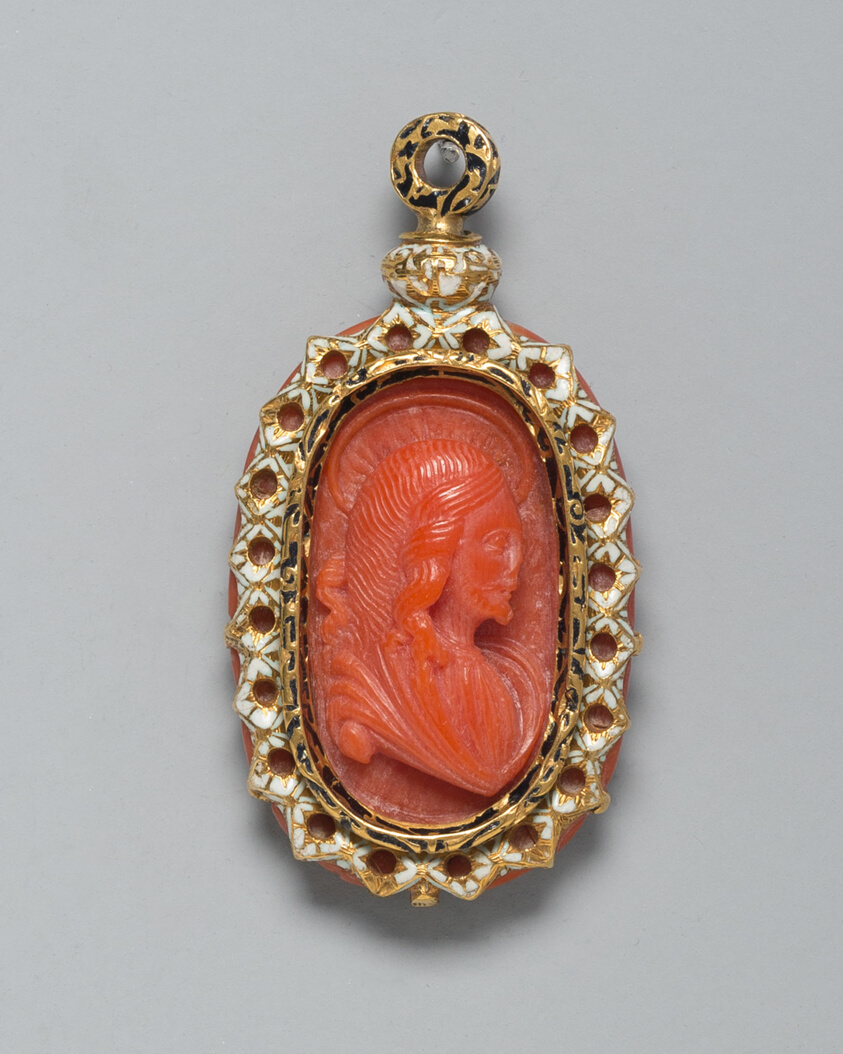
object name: Costume and Accessories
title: Double-Sided Pendant with the Virgin and Christ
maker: Italian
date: 18th century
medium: Gold, enamel, and coral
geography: Italy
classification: pendant (jewelry); jewelry; european decorative arts; costume